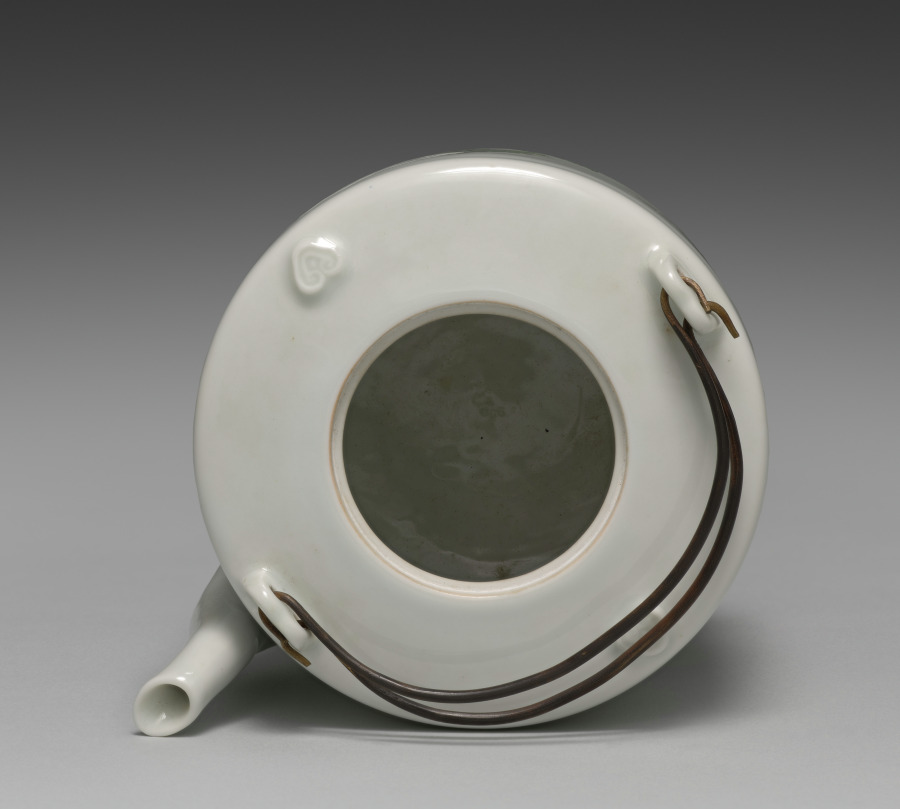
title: Sake Pourer with Flowers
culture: Japan, Meiji period (1868–1912)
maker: Seifū Yohei III (Japanese, 1851–1914)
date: 1893–1914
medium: Porcelain with molded design, overglaze color enamel, and metal handles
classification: Ceramic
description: This sake pourer is of a type called a chōshi. It is elaborately decorated with flowers in overglaze enamels in several colors, including black for the contour lines of leaves and stems; orange, white, gold, and two shades of green for the peonies; and purple for the thistles. The white blossoms have been built up with white enamel, then incised for a white-on-white eect; the orange and purple use an absence of color to produce the contours of individual petals. Yohei III referred to his works in multicolor overglaze enamels as “hundred flower brocades” (hyakka nishiki). Two small nyoi (C. ruyi) staff-head motifs, molded in clay and applied to either side of the lid, create handle rests, as well as natural places for the thumb and index finger of one hand to rest, so one can both secure the lid and steady the pour, while the handles are held in the other hand. The top of a nyoi staff resembles the curled cap of the reishi. Such scepters are imagined to be found in the hands of sages, Daoist immortals, or Buddhist deities and connote lofty goings-on and favorable circumstances. Since this sake pourer is unsigned, it may have been made for imperial family members to give as a gift.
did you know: This sake pourer with purple thistles and orange peonies shows off Seifū Yohei III’s technique of enamels painted over the glaze.